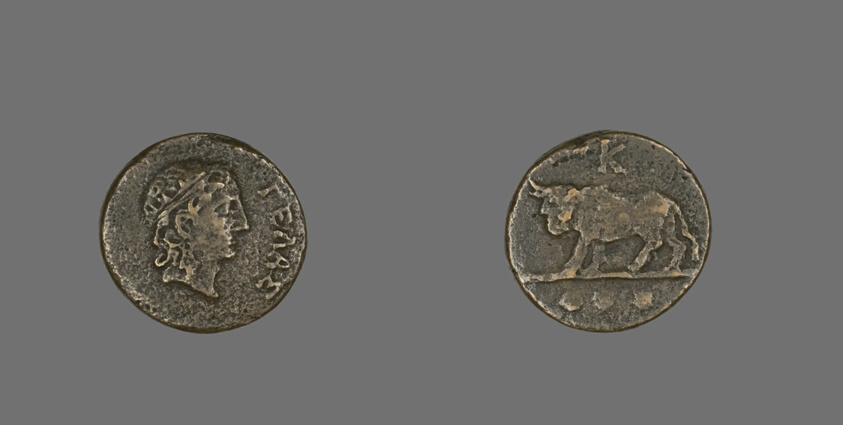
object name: Coin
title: Trias (Coin) Depicting the God Gelas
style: greek, ancient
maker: Greek, minted in Gela, Sicily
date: late 5th century BCE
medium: Bronze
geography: Gela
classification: coin; ancient art; struck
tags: mythological figures